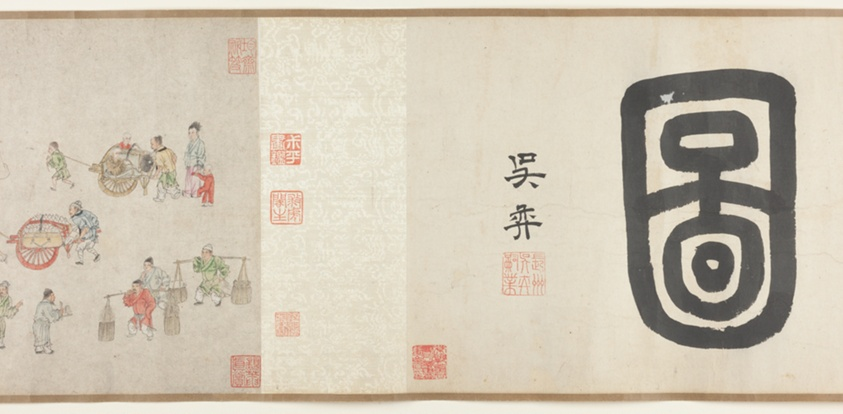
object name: Painting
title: Street Scenes in Times of Peace 太平風會圖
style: Chinese (culture or style)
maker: Zhu Yu (Zhu Junbi) 朱玉（朱君璧）; Chinese, 1293-1365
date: Yuan dynasty (1279–1368), 14th century 元朝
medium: Handscroll; ink and colors on paper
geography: China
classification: handscroll; painting; asian art